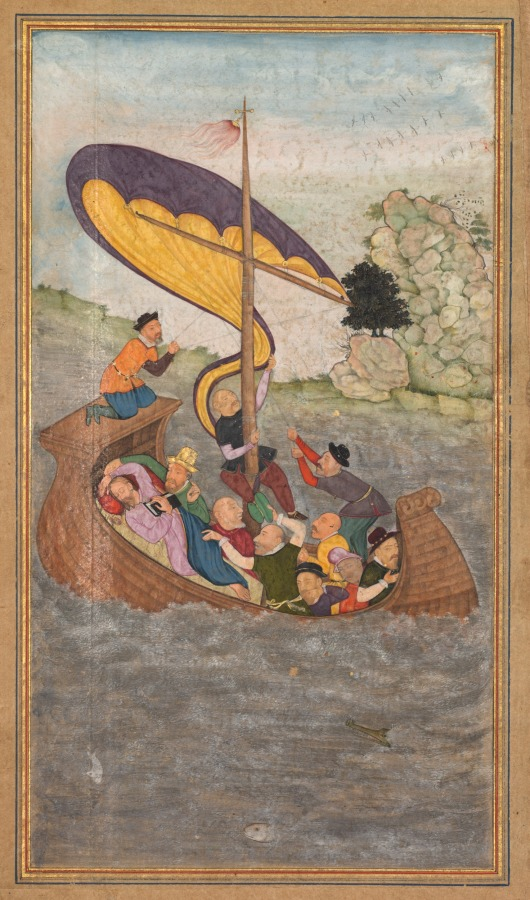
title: Jesus being awakened during a tempest on the Sea of Galilee (folio 77 recto), from a Mirror of Holiness (Mir’at al-quds) of Father Jerome Xavier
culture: Mughal India, Allahabad, made for Prince Salim (1569–1627)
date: 1602–4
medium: Gum tempera, ink, color, and gold on paper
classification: Manuscript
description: The boat carrying Jesus and his apostles encountered a tempest on the Sea of Galilee. As the apostles began to panic and fear that their boat would sink, Jesus continued to sleep peacefully. The painter illustrates the moment before Jesus was awakened by his apostles, who are frightened by the storm and perhaps also by the crocodile that sticks its head out of the waves. The power of the gale is indicated by the violently twisting sail and the Mughal-style tassel that swings at the top of the mast. This composition is the only one in the Cleveland manuscript to be based on an identifiable European print.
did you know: The apostle wearing green appears to be seasick.